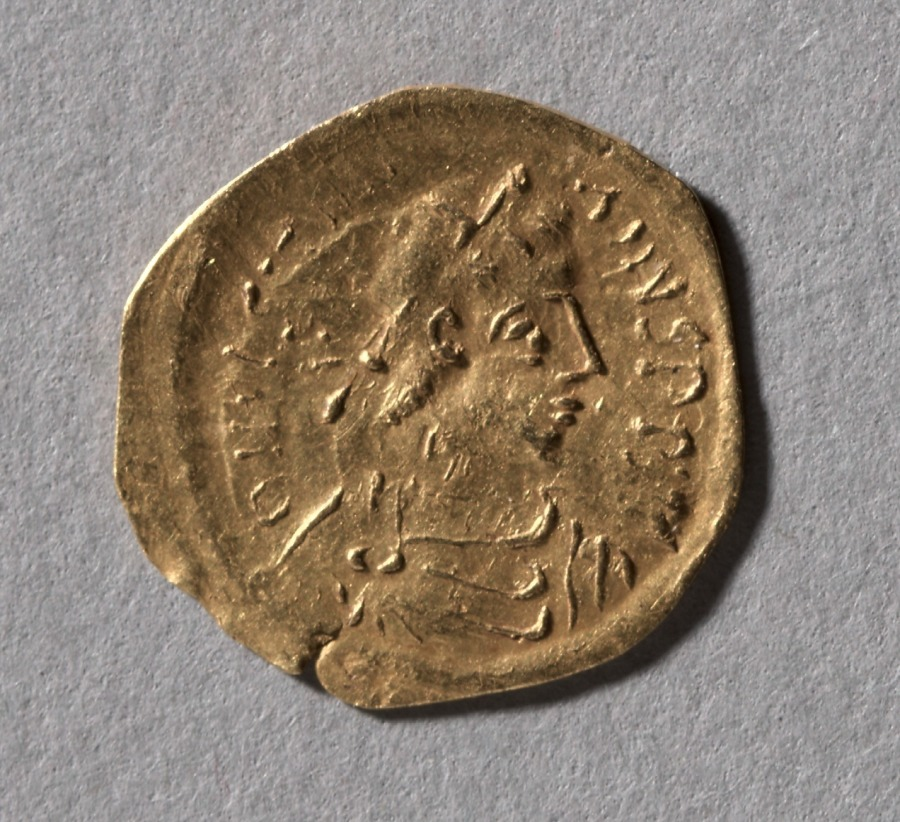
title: Half Tremissis of Justinian I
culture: Byzantinium, Constantinople, Byzantine period, 6th century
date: 527–565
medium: gold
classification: Coins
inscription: (Avers): DNIVSTINI ANVSPPA[VC] (Revers): VICTORIAAVC[VS]TORVM and CONO[B]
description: This solidus was issued during the reign of Emperor Justin II, successor of Justinian the Great.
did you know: Tremissis means "a third of a unit," referring to this coin's value in ancient Greece.